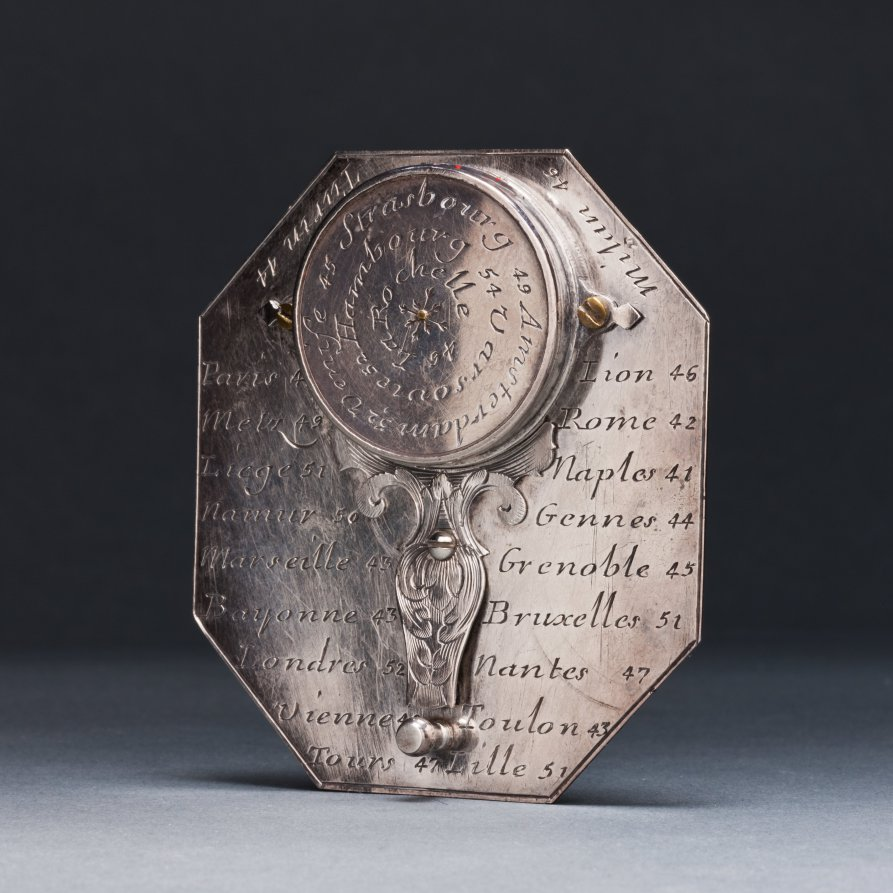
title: Butterfield Sundial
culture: France, 18th century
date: 1700s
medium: silver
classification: Silver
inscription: [Engraved signature above the compass in ribbon band]: "N. BION A Paris"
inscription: [Engraved on the face of the sundial]: “Pour 55° 4-5-6-7-8-9-10-11 50° IIII-V-VI-VII-VIII-IX-X-XI 45° 5-6-7-8-9-10-11 40° -VI-VII-VIII-IX-X-XI'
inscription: [Engraved on the other side]: "Pour 55° -8-7-6-5-4-3-2-1-0 50°-VIII-VII-VI-V-IIII-III-II-I 45°-8-7-6-5-4-3-2-1 40°-VII-VI-V-IIII-III-II-I"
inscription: [Engraved around the compass]: “NORD-OUEST-SUD-EST”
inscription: [Engraved on the back of the sundial]: “Turin 44 Milan 46 Paris 49 Lion 46 Metz 49 Rome 42 Liege 51 Naples 44 Namur 50 Gennes 44 Marseille 43 Grenoble 45 Bayonne 43 Bruxelle 51 Londres 52 Nantes 47 Vienne 48 Toulon 43 Tours 47 Lille 51”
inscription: [Engraved around the back of the compass]: “Venise 45 Strasbourg 49 Amsterdam 52 Hambourg 54 Varsovie 52 La Rochelle 46”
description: Butterfield-type sundials are characterized by their adjustable gnomons, metal flaps that cast a shadow on the dial’s face to indicate the hour, and geographical indices. This sundial has a scale adjustable between latitudes of 40° to 60° north. The latitudes of 26 European towns are engraved on its back for quick reference. With an intricately engraved silver face, it would have functioned as a fashionable traveler’s accessory.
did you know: Butterfield-style sundials were named after Micheal Butterfield, an English scientific and mathematical instrument maker who worked in Paris between 1674 and 1724.